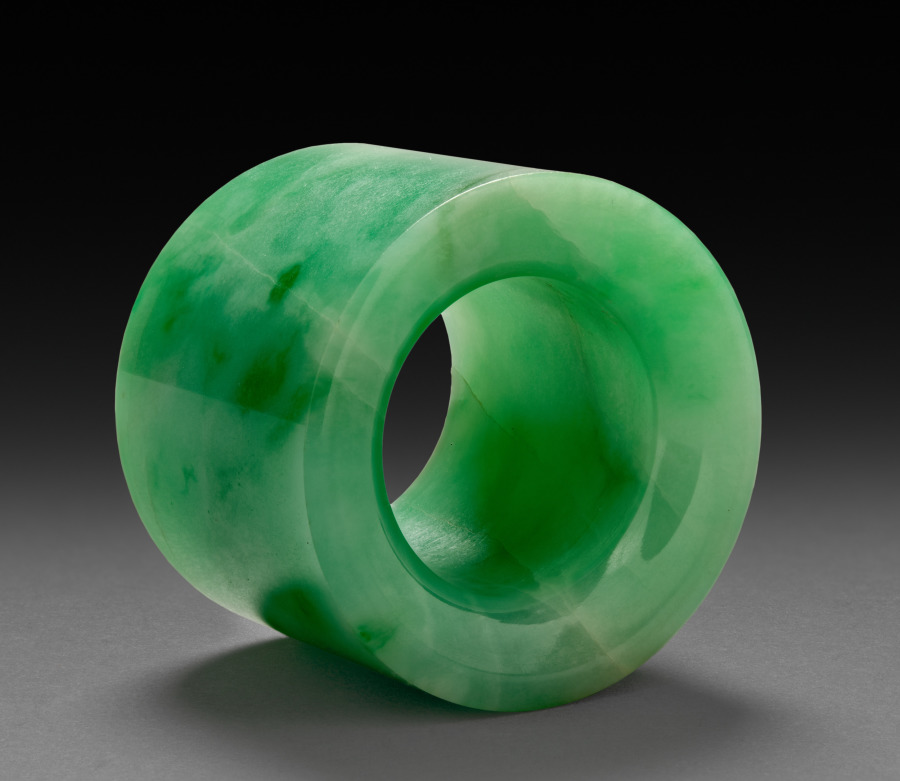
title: Thumb Ring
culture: China, Qing dynasty (1644-1911) or Republican period (1912-49)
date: 1800s–1900s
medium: green and white jade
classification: Jewelry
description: Jade rings were worn by men on the thumb of the right hand to assist with holding and pulling the string of the archer’s bow. However, thumb rings were also fashionable accessories for civil officials in the late Qing dynasty.